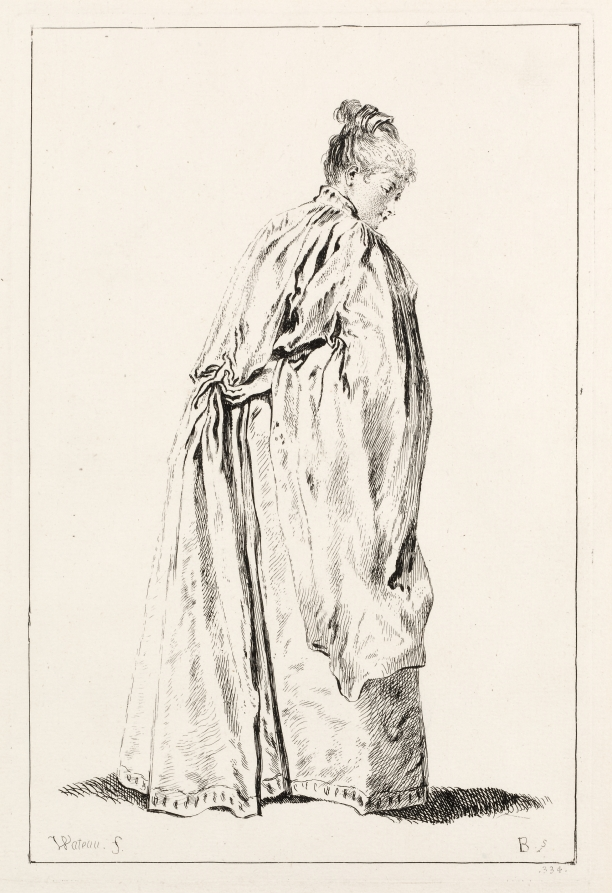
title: Woman Standing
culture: France, 18th century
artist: François Boucher (French, 1703–1770)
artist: after Jean-Antoine Watteau (French, 1684–1721)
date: 1726–35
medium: etching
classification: Print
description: One of the most lavish tributes paid to the memory of Jean-Antoine Watteau (1684-1721) was the publication of four volumes of more than 600 prints (1726-35) after all the paintings and drawings known by the master. Boucher was one of the printmakers who worked on the project, which enabled him to study Watteau's draftsmanship, one of the most significant lessons of his early career.